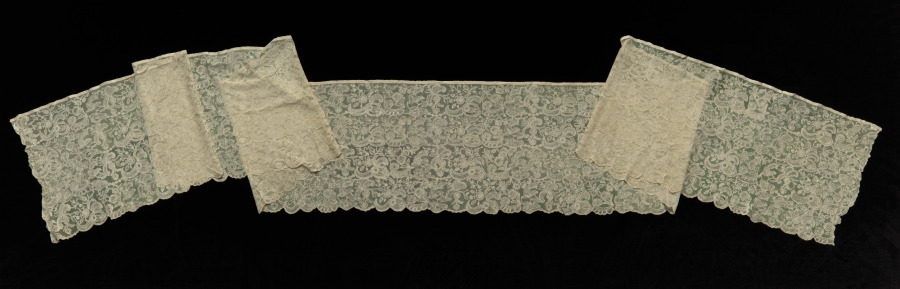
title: Lace Flounce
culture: Flanders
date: 1700s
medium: Linen: bobbin lace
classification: Lace